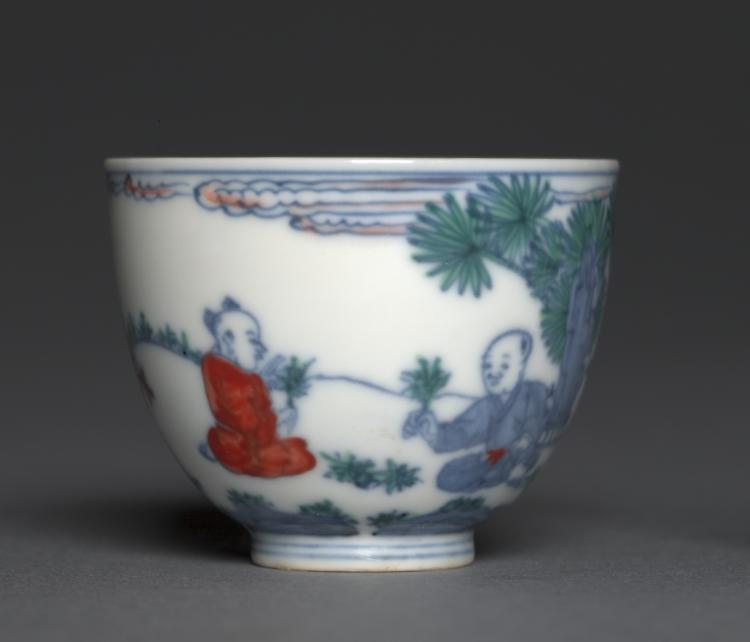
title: Wine Cup with Children at Play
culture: China, Jiangxi province, Jingdezhen, Ming dynasty (1368-1644), Chenghua mark and period (1465-1487)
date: 1465–87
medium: porcelain with underglaze blue and overglaze enamel decoration, docai ("joined colors") ware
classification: Ceramic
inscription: 大明成化年製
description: This delicate wine cup, only two inches high, exhibits free, spontaneous drawing as well as perfect compositional balance over its small surface area. The motifs were outlined with cobalt blue; the piece was then glazed and fired in the normal way for making the blue-and-white ware. After firing, the outline painting was completed with colored enamels over the glaze. The piece was fired the second time. The pictorial decoration is refined and complicated; the porcelain body is of exceptionally high quality and is thin, translucent, and light in weight.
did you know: Chenghua ware demonstrates one of the high points of technological accomplishment in Chinese porcelain production.